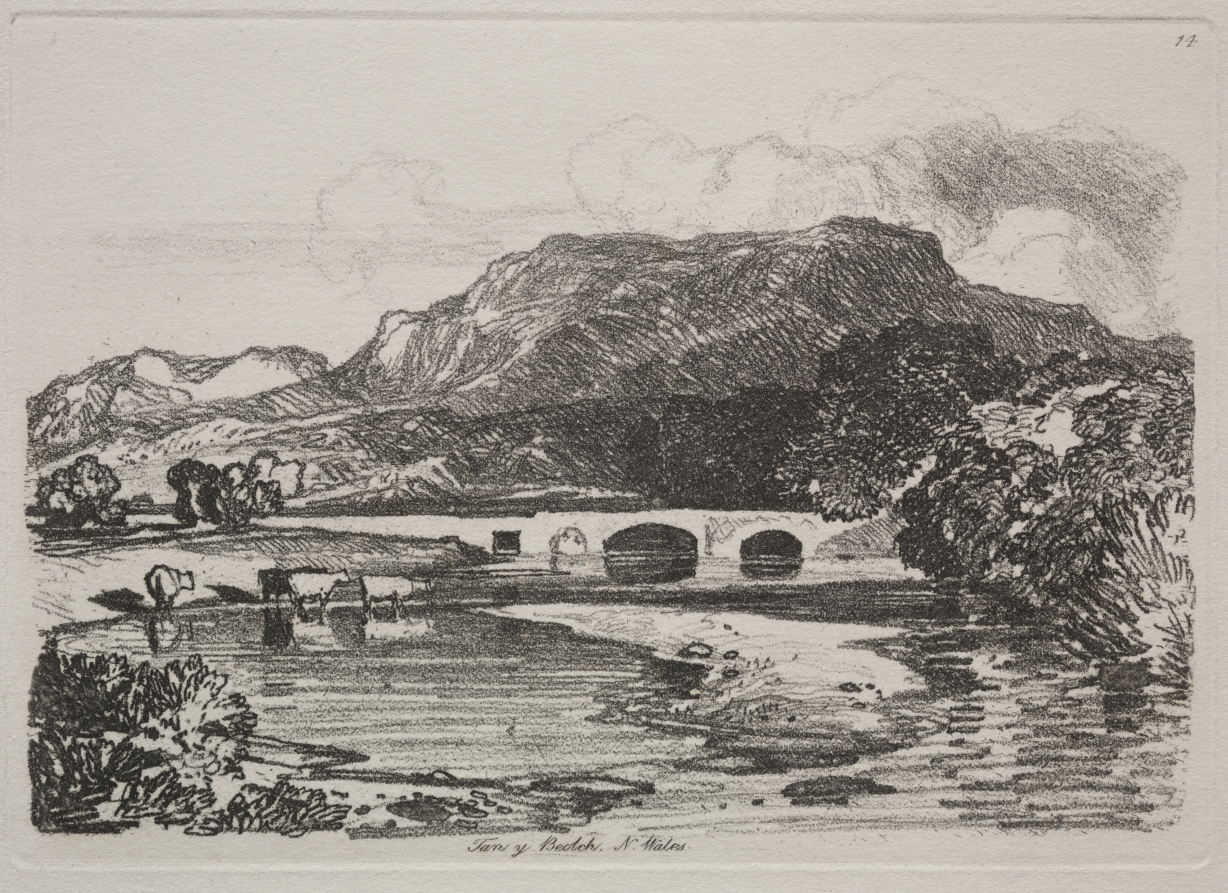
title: Liber Studiorum: Tan y Beolch, North Wales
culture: England, 19th century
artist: John Sell Cotman (British, 1782–1842)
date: 1838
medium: etching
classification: Print